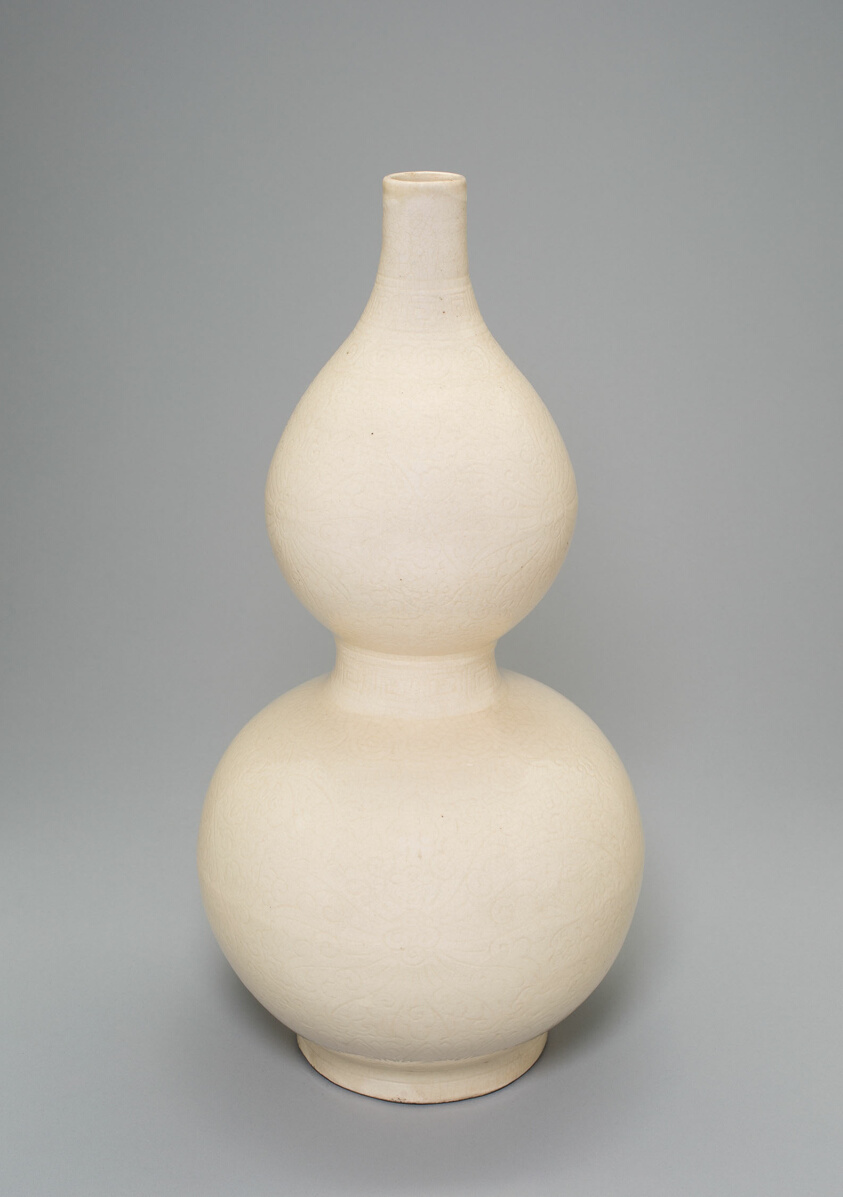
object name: Vessel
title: Gourd-Shaped Vase with Floral Scrolls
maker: China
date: Song dynasty (960–1279)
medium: Stoneware with underglaze molded decoration and ivory glaze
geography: China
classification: stoneware; asian art; ceramics